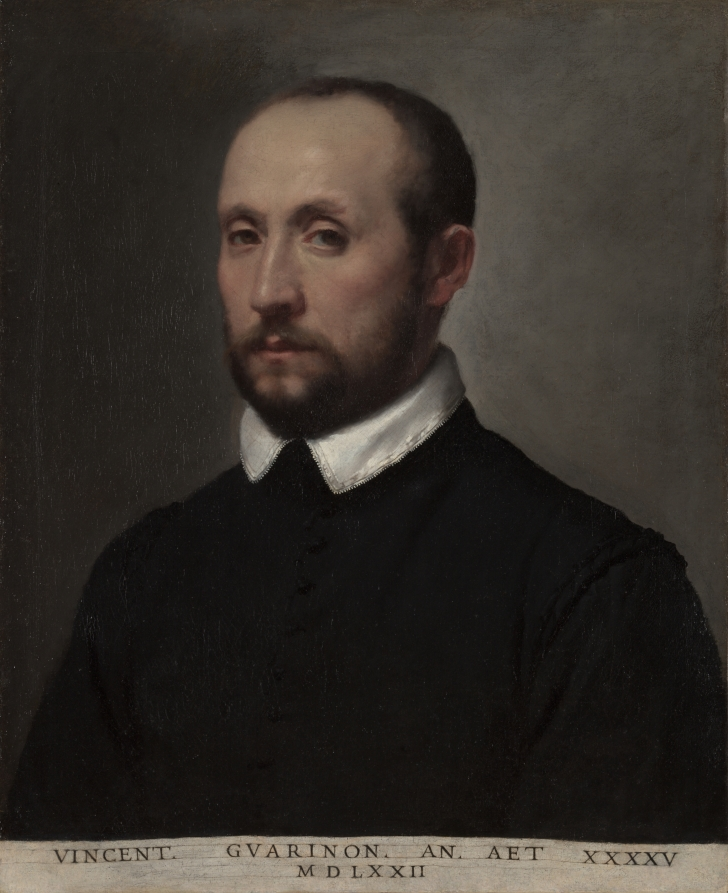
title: Portrait of Vincenzo Guarignoni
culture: Italy, Bergamo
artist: Giovanni Battista Moroni (Italian, 1525–1578)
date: c. 1572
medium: oil on canvas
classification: Painting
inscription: Inscribed at bottom: "VINCENT. GVARINON. AN. AET. XXXXV / MDLXXII"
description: The Latin inscription gives the sitter's name and age (45), as well as the painting's date. Guarignoni came from a prominent family in the northern Italian city of Bergamo. His direct and thoughtful gaze enhances the painting’s lifelike quality, while the solemn detachment conveys dignity and excellence rather than an exact personality, a common approach in Renaissance portraiture.